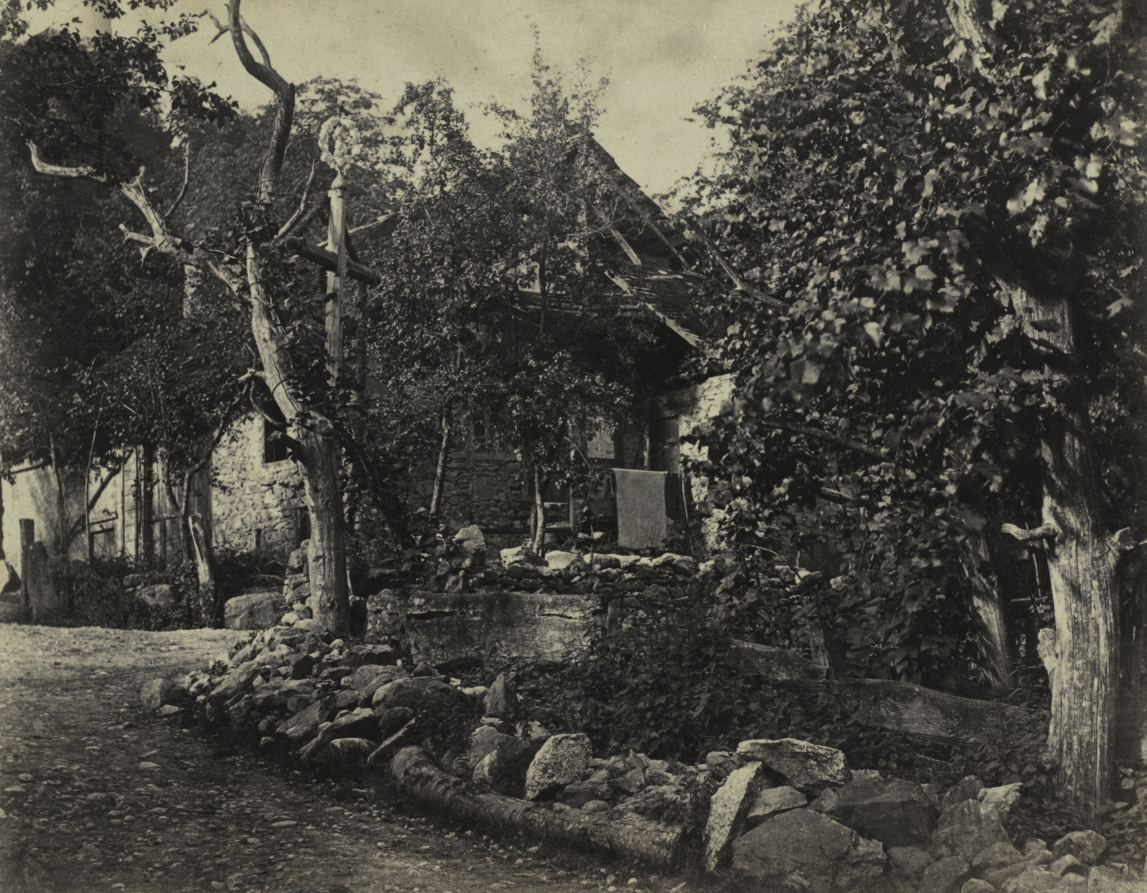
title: Rural Scene with Stone Building and Cross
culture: France, 19th century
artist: Charles-Fortunat-Paul-Casimir Perier (French, 1812–1897)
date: c. 1857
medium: albumen print from wax paper negative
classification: Photograph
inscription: Written in pencil on verso: "Paul Perier";"#100"; "34 / 20 x 25.5"; "24 x 25.5"